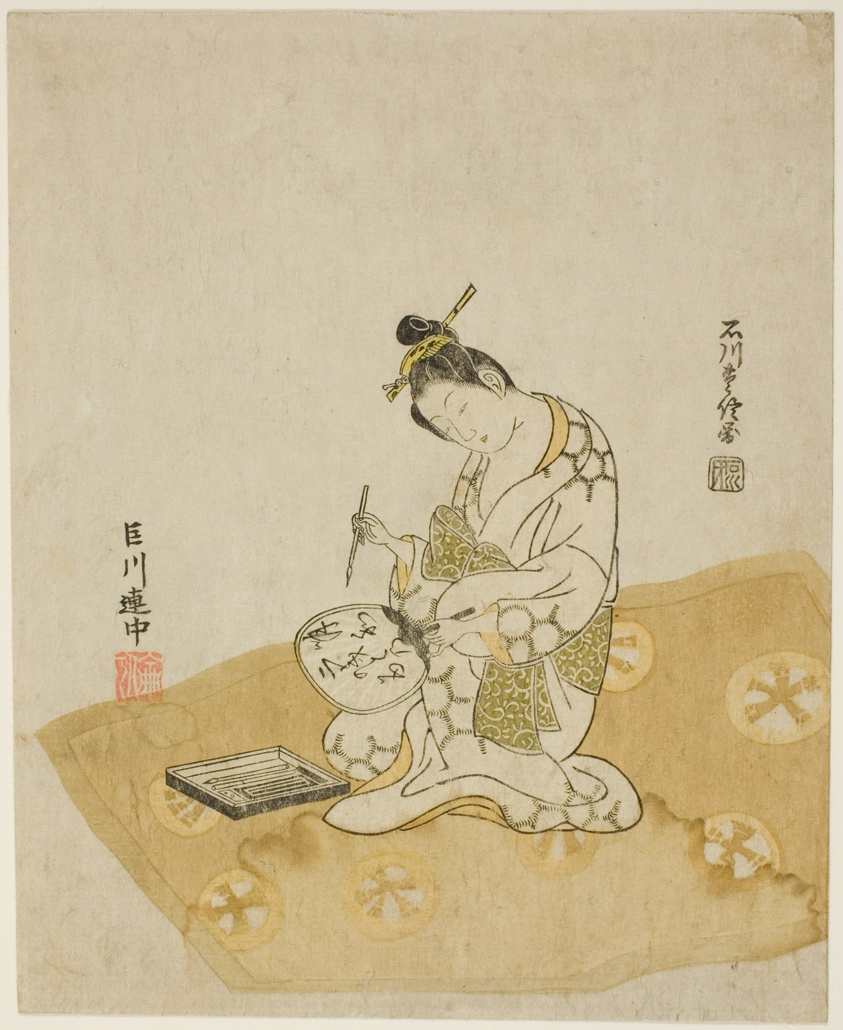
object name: Print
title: Writing on a Fan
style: Japanese (culture or style)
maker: Ishikawa Toyonobu (Japanese, 1711-1785)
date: 1765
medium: Color woodblock print; koban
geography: Japan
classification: woodblock print; print; asian art